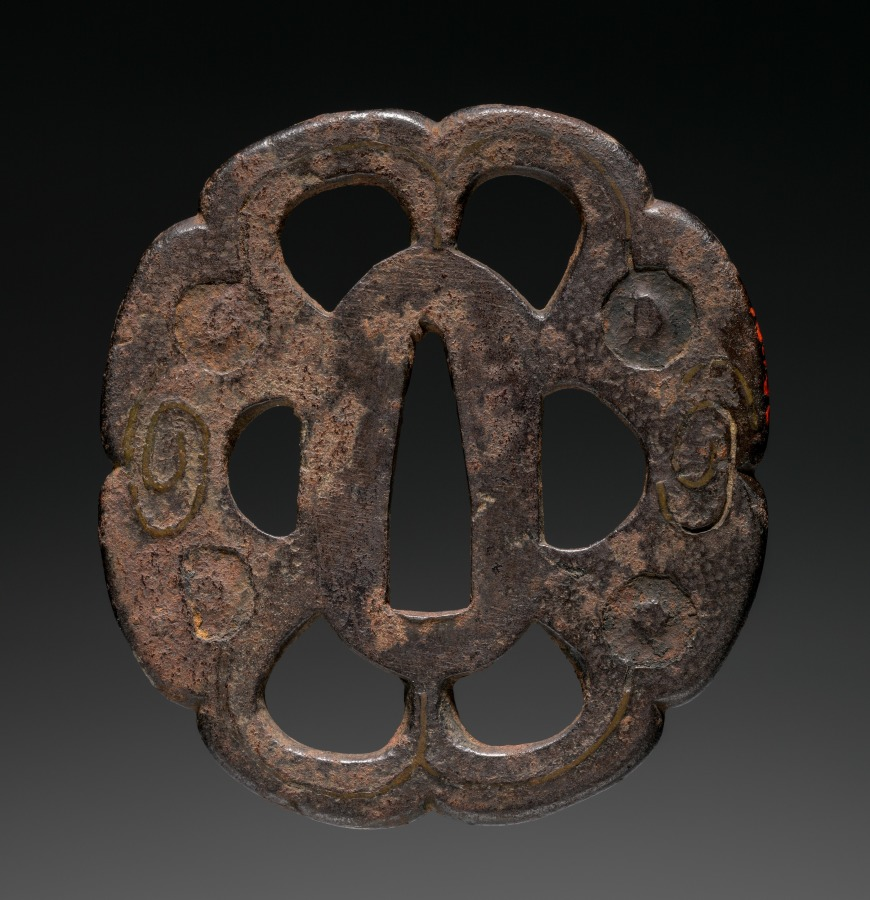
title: Sword Guard (Tsuba)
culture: Japan, Edo period (1615–1868)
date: 1800s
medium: iron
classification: Arms and Armor